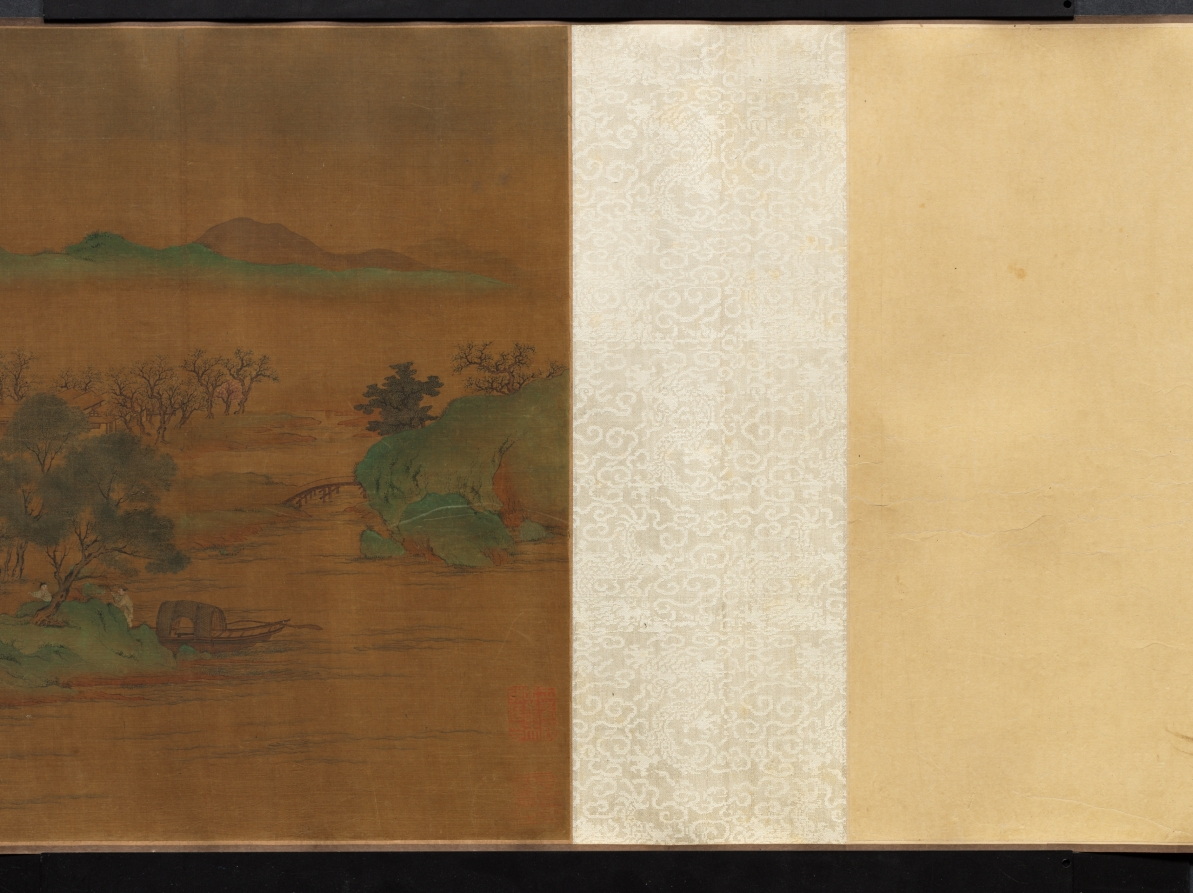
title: Landscape, The Palace of the Clouds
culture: China, Qing dynasty (1644-1911)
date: 1644–1911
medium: handscroll, ink on silk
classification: Painting